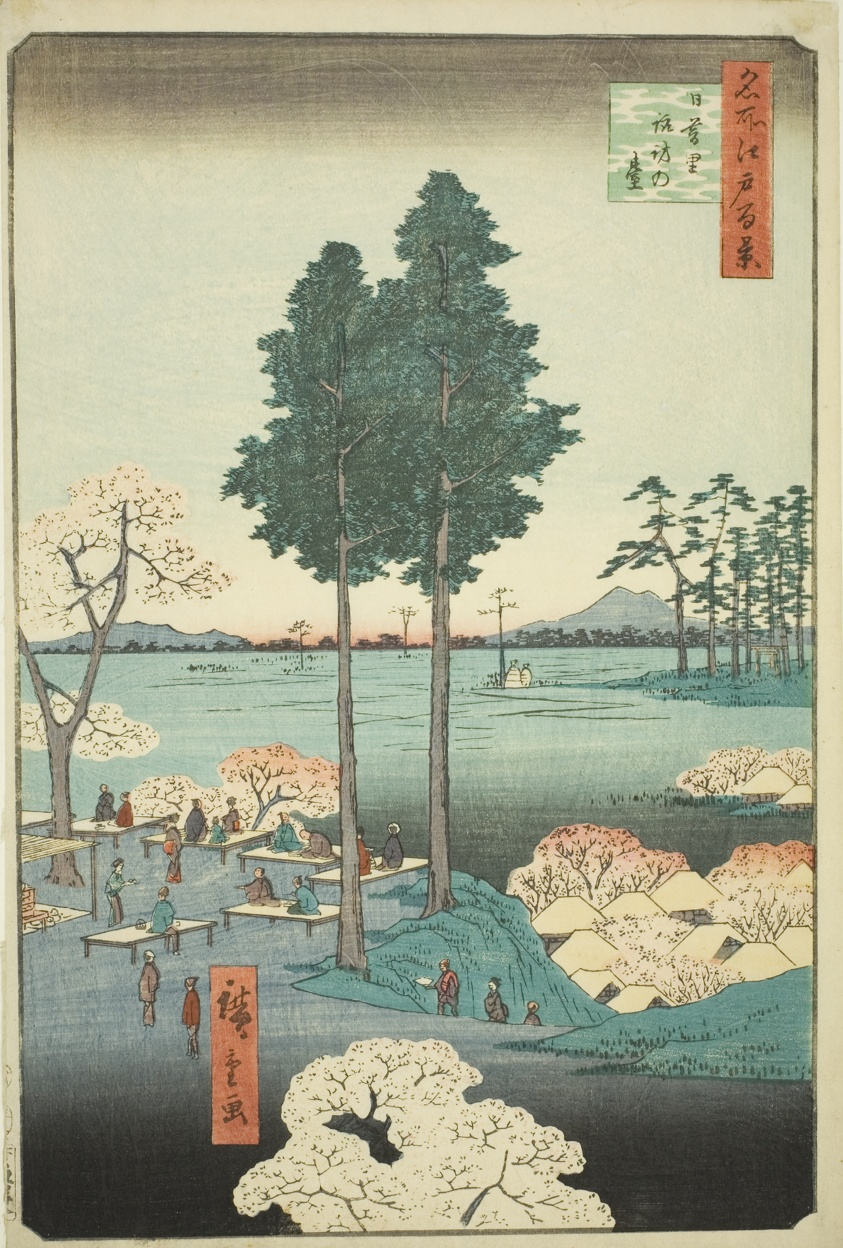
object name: Print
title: Suwa Bluff at Nippori (Nippori Suwanodai), from the series "One Hundred Famous Views of Edo (Meisho Edo hyakkei)"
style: Japanese (culture or style)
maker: Utagawa Hiroshige 歌川 広重; Japanese, 1797-1858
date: 1856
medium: Color woodblock print; oban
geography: Japan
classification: woodblock print; print; asian art